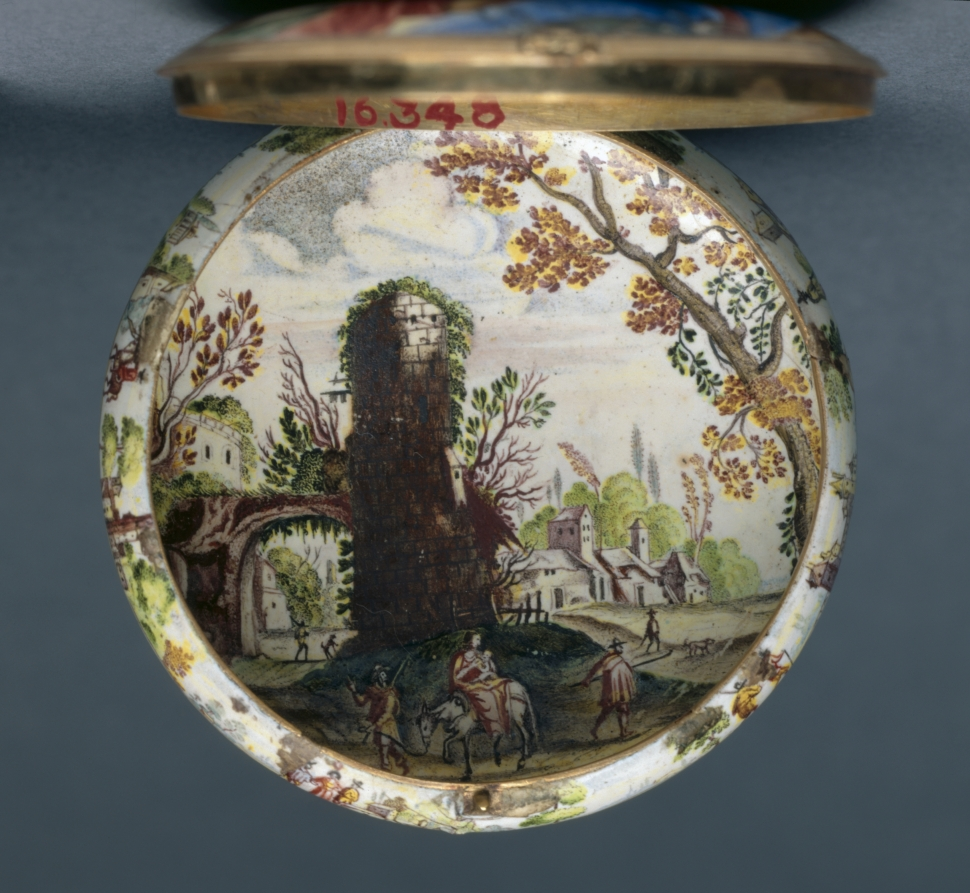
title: Watchcase (Boîtier de montre)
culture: France, 17th century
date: c. 1640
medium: gold and enamel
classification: Jewelry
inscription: [engraved on the rim]: "B8"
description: In the 1630s, the practice of painting with enamel on metal became a means for French miniature painters to achieve a more richly colored, durable product. Previously miniatures were painted with watercolor on vellum, a material made from animal skin. This case would have originally held a watch, but was later transformed into a simple box through the removal of the watch mechanism and ring. This watch case is richly painted inside and out with miniatures modeled after well-known religiously allegorical works.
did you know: Inspiration for the box’s miniatures was drawn from works by Peter Paul Rubens’ The Holy Family with Saints John the Baptist and Elizabeth (1615) (back panel) and Nicolas Cochin (interior base).